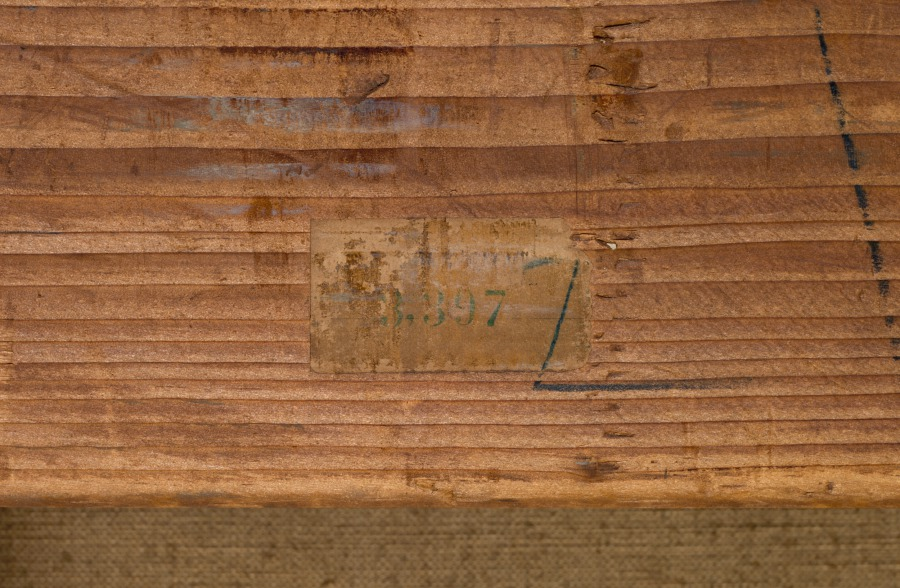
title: The Call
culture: France, late 19th-early 20th Century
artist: Paul Gauguin (French, 1848–1903)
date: 1902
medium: oil on fabric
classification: Painting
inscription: Signed lower right: P. Gauguin / 1902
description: Painted on a remote island in Polynesia a year before the artist's death, The Call belongs to a series of late works that explore the mysteries of life and death. Two women stand with bare feet, as if on sacred ground. One woman gestures to someone outside the picture, perhaps responding to a "call" from fate or destiny. Gauguin realized his ambition of painting from memory and the imagination through such mysterious, dreamlike images.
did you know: Although known as one of the founders of modern art, Gauguin found inspiration in ancient Greek, Roman, and Egyptian art. The woman with the pointing finger on the right side of this painting was taken from a figure on the Parthenon frieze.